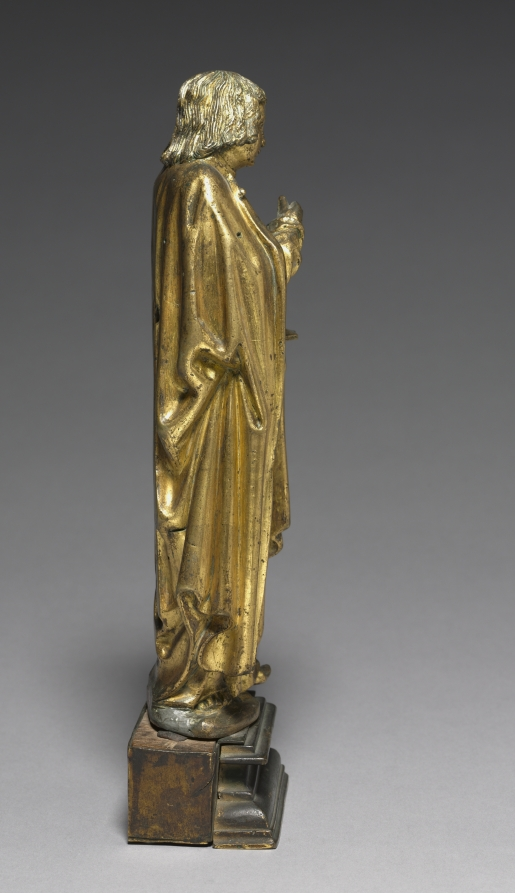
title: Saint John the Evangelist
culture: South Netherlands, probably Malines, 15th century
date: 1450–1475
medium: gilt bronze or brass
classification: Sculpture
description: The saint holds the legendary chalice, a poisoned cup, from which emerges a dragon, representing the serpent (Satan), recalling the incident in which John was forced to drink poison to test the power of his faith. John survived the test unharmed. It has been suggested that this statuette derives from a large multitiered baptismal font with niche figures in the Church of Notre-Dame in the town of Hal.